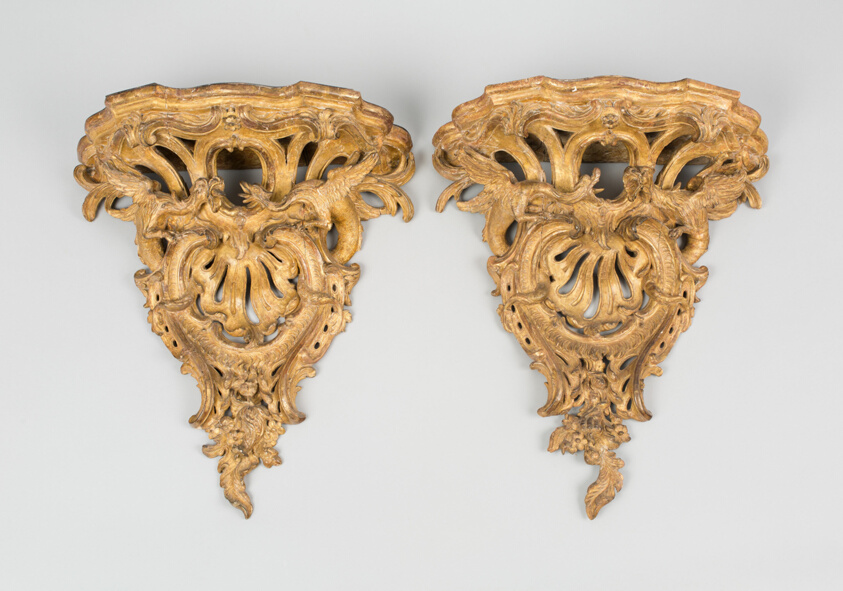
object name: Furniture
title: Bracket (one of two)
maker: France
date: c. 1735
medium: Wood, possibly oak, carved and gilded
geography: France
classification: rack; furniture; european decorative arts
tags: furniture